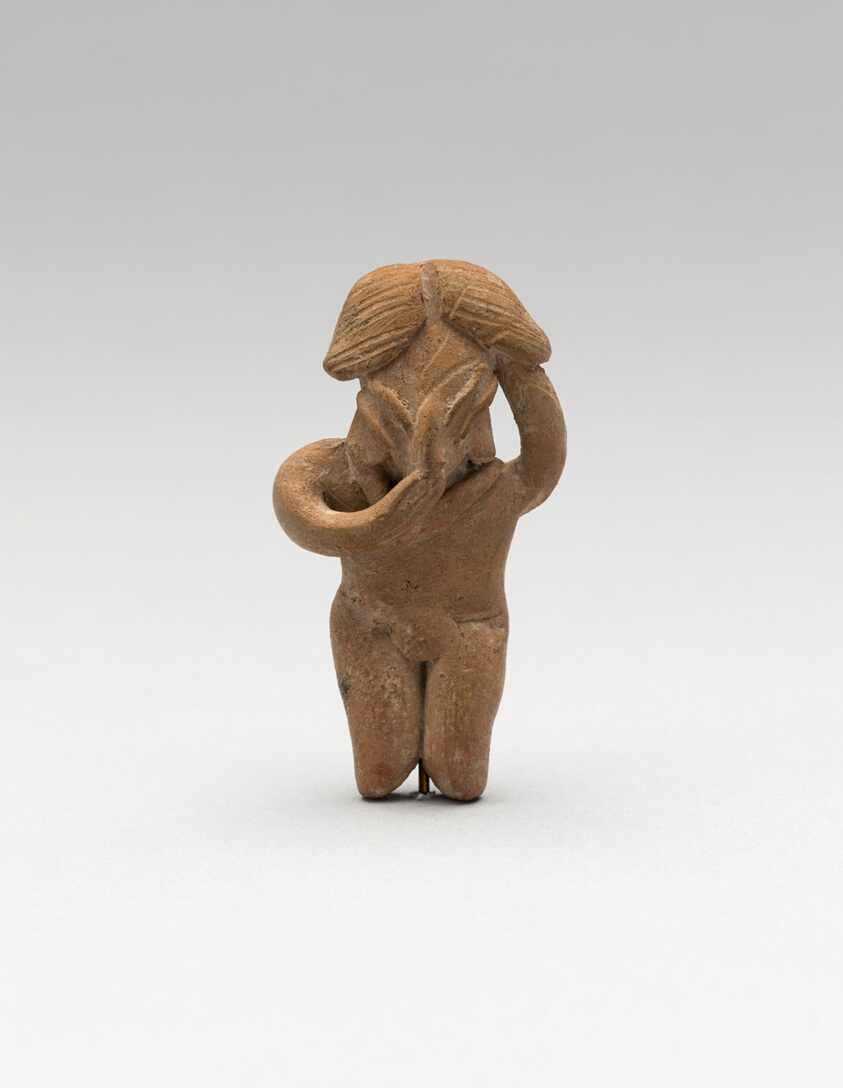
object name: Sculpture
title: Standing Female Figurine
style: chupicuaro, mesoamerican, americas, Arts of the Americas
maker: Chupícuaro (Guanajuato or Michoacán, Mexico)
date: 500–300 BCE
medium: Ceramic and pigment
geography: Chupícuaro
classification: earthenware; ceramics; sculpture; art of the americas; miniature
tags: people